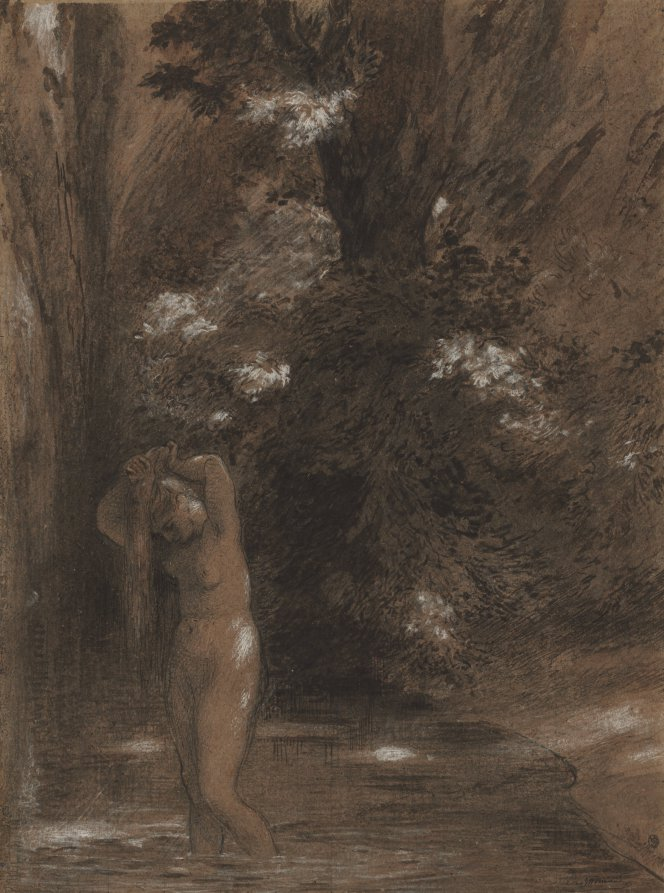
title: The Bath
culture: France, 19th century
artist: Félix Bracquemond (French, 1833–1914)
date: c. 1900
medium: brush and black and brown wash with pen and black ink, black chalk, and charcoal, heightened with white chalk, on brown wove paper laid on yellow-beige wove paper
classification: Drawing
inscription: inscribed, lower right, in brown ink: Bracquemond; inscribed, at bottom, in black chalk: 1 2 3 4 5 6 7 8; at lower right, in black ink: mark of Alfred Beurdeley [Lugt 421]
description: This drawing relates to Félix Bracquemond’s interest in integrating various artistic techniques, a practice that became increasingly common around 1900. With a range of black and white media, the artist depicted a nude in a forest pool. Faint gridding was used to transfer the image either to or from a similar enamel and a print. An important part of this working process, the drawing was included in both of the major exhibitions of Bracquemond’s oeuvre during his life. From one of these displays, in 1907, Bracquemond sold it to Parisian collector Alfred Beurdeley, who acquired hundreds of drawings with the aim of representing the art of his time.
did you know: Bracquemond drew extensively and promoted the medium as the source of all artistic practice.